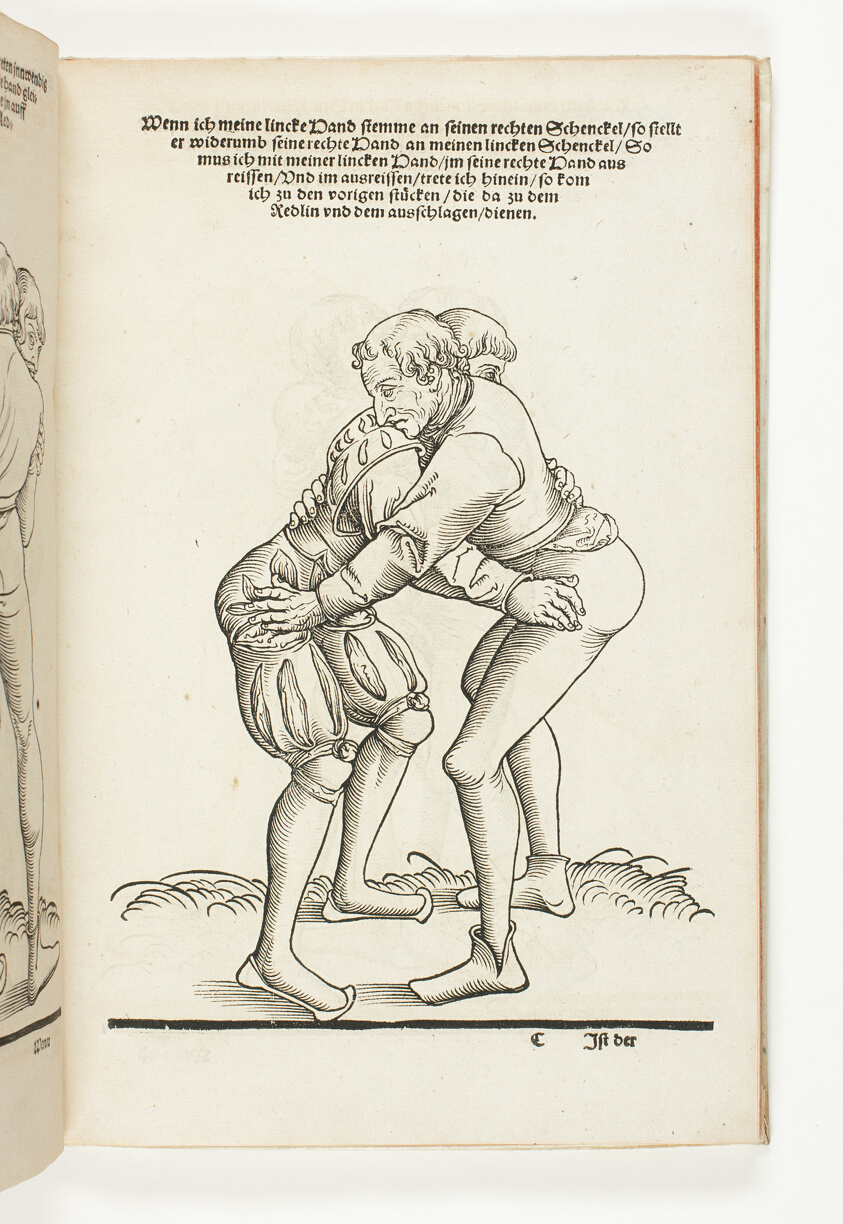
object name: Book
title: The Art of Wrestling: Eighty-Five Pieces (Ringer Kunst: Fünff und Achtzig Stücke)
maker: Lucas Cranach the Younger (German, 1515-1586); written by Fabian von Auerswald (German, born 1462); printed by Hans Lufft (German, 1495-1584)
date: 1539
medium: Book with woodcuts and letterpress in black on cream laid paper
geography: Germany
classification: book; paper; prints and drawing